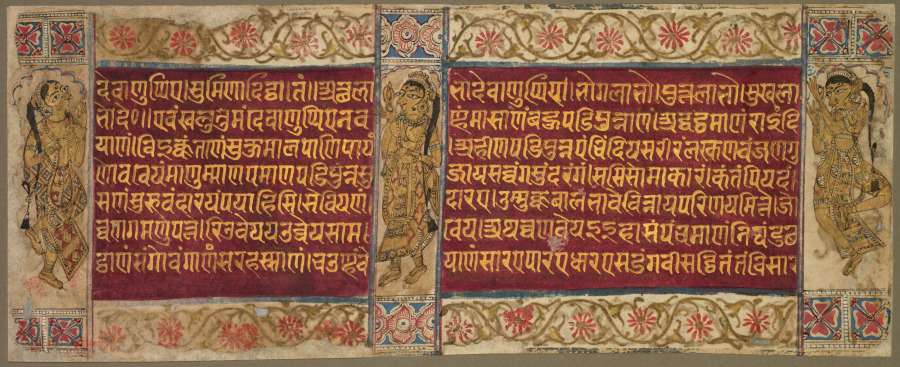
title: Celestial Dancers, folio 5 (recto), from Brahman Rishabhadatta's speech, from a Kalpa-sutra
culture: Western India, Gujarat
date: c. 1475–1500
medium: gum tempera and gold on paper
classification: Painting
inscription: [[recto, beginning with line 1]] devāṇuppie | sumiṇā diṭṭhā | taṁ || attha lābho devāṇuppie | bhoga lābho | sutta lābho | sukha lā- [line 2] bho de° || evaṁ khalu tumaṁ devāṇuppie navaṇhaṁ māsāṇaṁ bahupaḍipunnāṇaṁ | addh’aṭṭhamāṇaṁ rāïṁdi- [line 3] yāṇaṁ | viïkkaṁtāṇaṁ sukumāla-pāṇi-pāyaṁ | ahīṇa-paḍipunna-paṁc’iṁdiya-sarīraṁ lakkhaṇa-vaṁjaṇa-gu- [line 4] ṇovaveyaṁ māṇ’ummāṇa-pamāṇa-paḍipunna-sujāya-savv’aṁga-suṁdar’aṁga | sasi-somākāraṁ | kaṁtaṁ piyadaṁ | [line 5] saṇaṁ surūvaṁ dārayaṁ payāhisi | se vi ya ṇaṁ dārae | ummukka-bāla-bhāve vinnāya-pariṇaya-mitte | jo- [line 6] vvaṇagam’anupatte | riuveya-yaüvveya-sāma|veya|-atthavvaṇaveya iïhāsaṁ paṁcamāṇaṁ nighaṁṭu-cha- [line 7] ṭṭhāṇaṁ s’aṁgovaṁgāṇaṁ sarahassāṇaṁ | caüṇhaṁ veyāṇaṁ sārae pārae dhārae saḍ’aṁgavī saṭṭhi-taṁtaṁ visāra-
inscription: [[verso, beginning with line 1]] e | saṁkhāṇe sikkhā kappe | vāgaraṇe | cchaṁde nirutte | joyasām=ayaṇe annesu ya bahūsu baṁbhannaesu [line 2] parivvāyaesu | supariniṭṭhie yāvi bha[vi]ssa|i taṁ orālaṁ tume devāṇuppie | jāva ārogge-tuṭṭhidī- [line 3] –hāüya-maṁgalla-kallāṇa-kāragā ṇaṁ tume devāṇuppie sumiṇā diṭṭhā ti kaṭṭu bhujjo 2 aṇuvūha- [line 4] ï | aṇu 2 tae ṇaṁ sā Devāṇaṁdā māhaṇī Usabhadattassa māhaṇassa aṁtie eyam=aṭṭhaṁ soccā | nisa- [line 5] mma haṭṭha-tuṭṭhā jāva haya-hiyayā kara-yala-pariggahiyaṁ dasa-nahaṁ sirasā vattaṁ matthae jaṁ aṁjali [line 6] kaṭṭu | Usabhadattaṁ māhaṇaṁ evaṁ vayāsī | evam=eyaṁ devāṇuppiyā taham=eyaṁ devā° avitaham=eyaṁ [line 7] de | asaṁdiṭṭham=eyaṁ de icchi[ya]m=eyaṁ devā° pa|ḍicchiyam=eyaṁ devā° paḍicchiyam =eyaṁ devāṇuppiyā | sacce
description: Manuscripts of the Kalpa-sutra are sacred embodiments of Jain doctrine. For this reason, they are worthy of beautification, adornment, and celebration by the inhabitants of heaven, such as the celestial dancers under cusped arches on this page. The commissioning of a manuscript is believed to cleanse donors of the karmic effects of past wrongdoing. Wealthy donors gained prestige in the community with the costly production of a sacred manuscript.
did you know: The "further eye" extending beyond the bounds of the face is a characteristic of 15th-century painting.